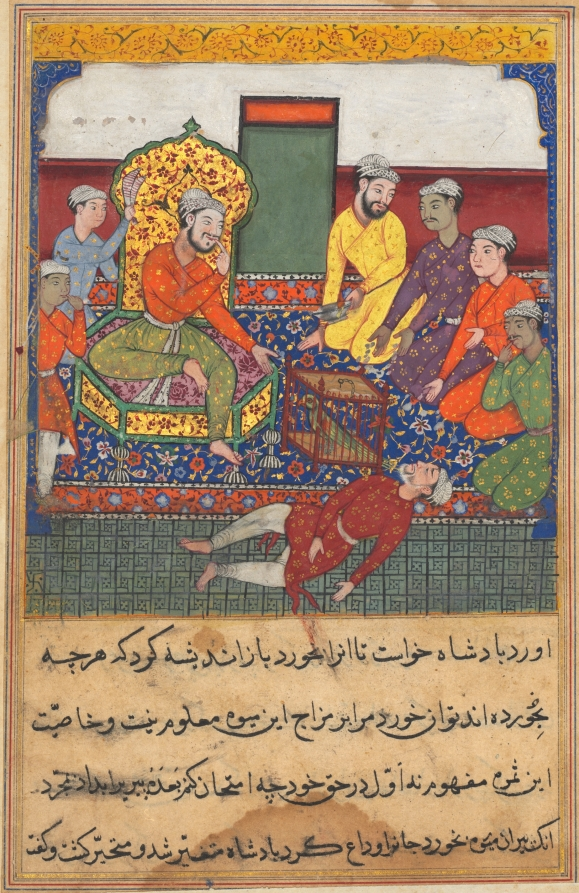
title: The old man eats of the fruit of the Tree of Life, but drops dead, from a Tuti-nama (Tales of a Parrot): Ninth Night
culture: Mughal India, court of Akbar (reigned 1556–1605)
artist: Lalu (Indian, active mid-1500s)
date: c. 1560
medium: gum tempera, ink, and gold on paper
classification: Painting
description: The enthroned king stares in amazement at the body of the old man. The parrot, who brought the king the fruit, sits in a cage at the center of the room. Believing the parrot to be a traitor, the king orders his execution. However, unbeknownst to the king, the fruit was actually poisoned by the bite of a venomous snake.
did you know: The gesture of the index finger touching the mouth indicates shock, awe, or bewilderment.